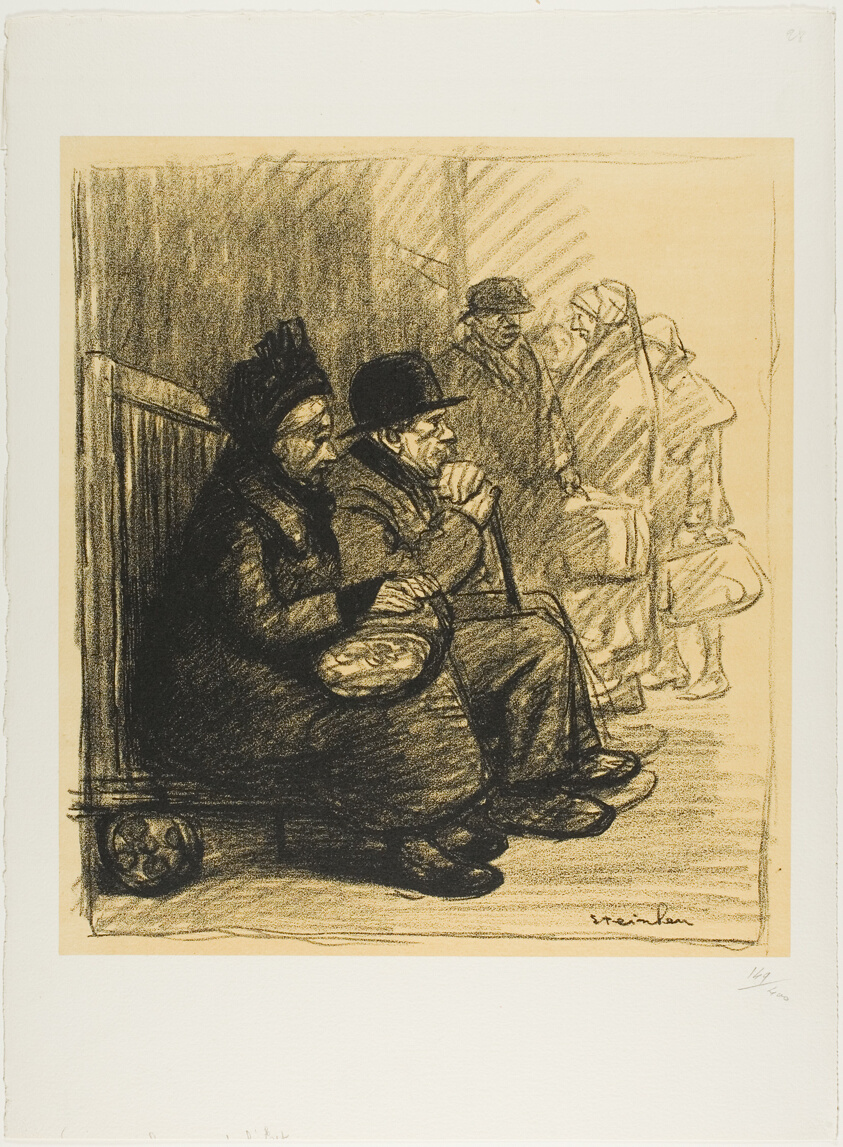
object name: Print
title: Verdunois at the Gare de l'Est Station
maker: Théophile-Alexandre Steinlen; French, born Switzerland, 1859-1923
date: 1915/17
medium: Lithograph in black over a fawn tint on off-white wove paper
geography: France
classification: lithograph; print; prints and drawing